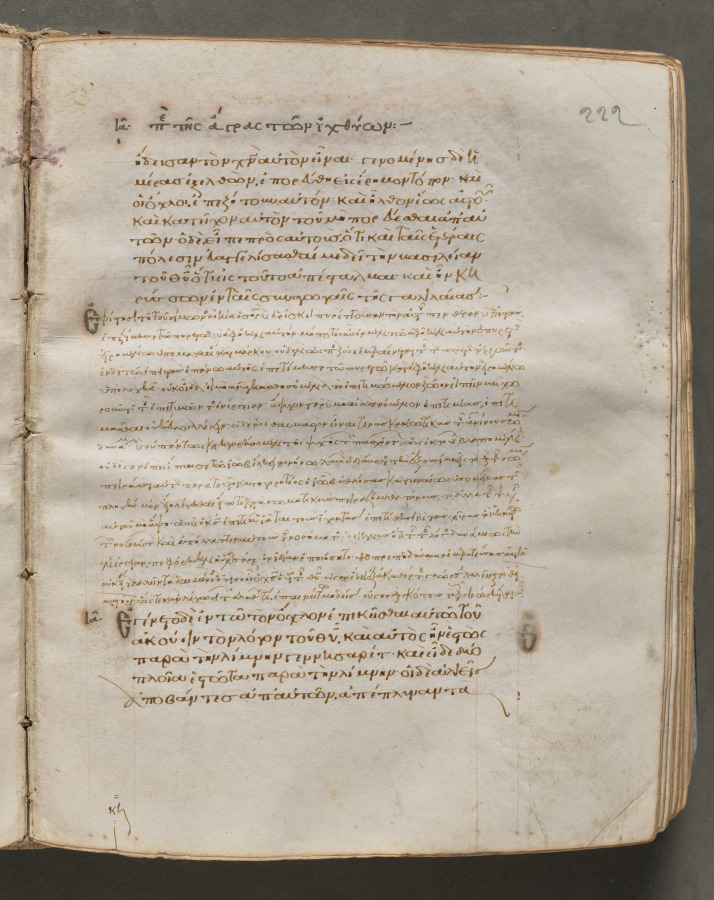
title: Text, folio 222 (recto), from a Gospel Book with Commentaries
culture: Byzantium, Constantinople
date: c. 1000–1100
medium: ink, tempera, and gold on vellum; leather binding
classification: Bound Volume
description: Each of the four gospels in this book opens on a page with brilliantly illuminated borders depicting the author of the text as well as birds-principally peacocks, symbols of the immortality of the soul-and fountains, representing the fountain of life and the salvation of the soul. This volume consists of 428 leaves with texts in Greek. Its level of sophistication suggests that it was probably written and decorated in a monastery in Constantinople.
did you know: Gospel Books were carried in procession through Byzantine churches.